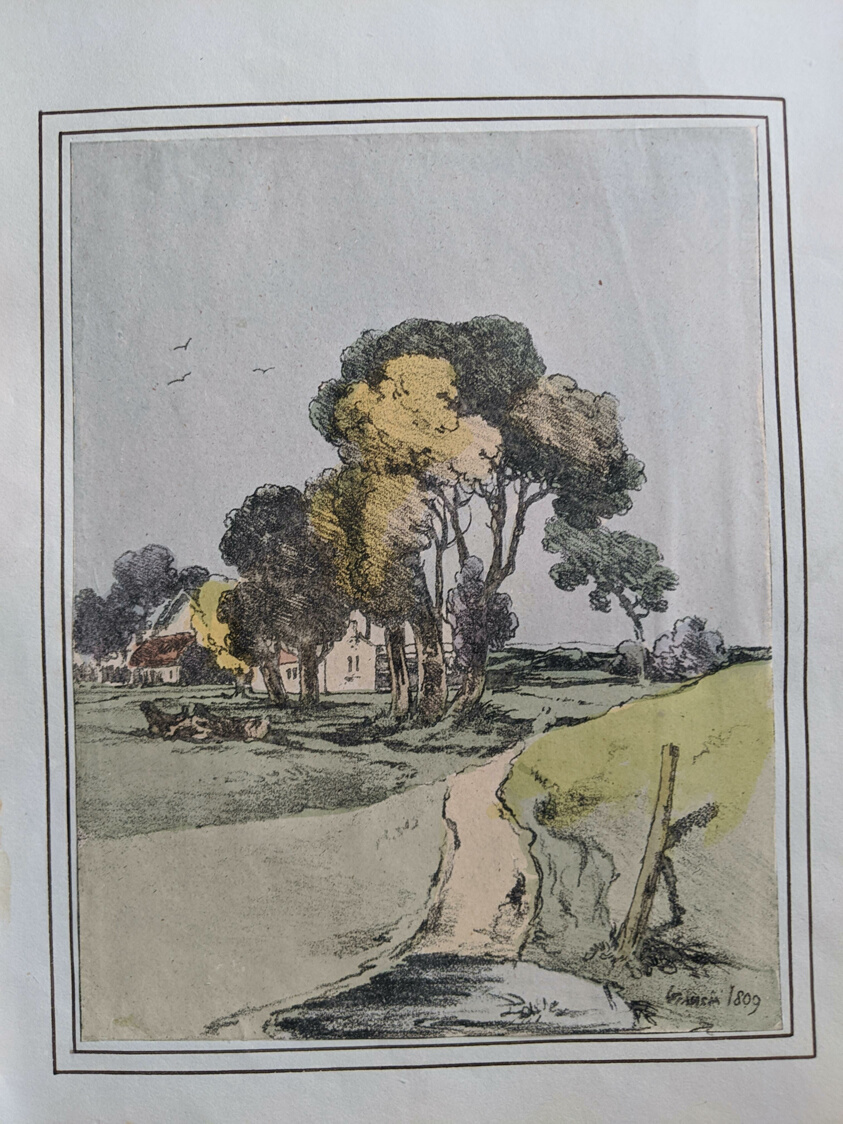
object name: Print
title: Studies of Landscapes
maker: François-Thomas-Louis Francia (French, 1772–1839); after various English artists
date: 1810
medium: 46 soft ground etchings in black, some heightened with wash, on ivory, blue, and buff wove papers, mounted onto 39 sheets of cream wove paper, ruled with pen and brown ink (with 5 unrelated prints)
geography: France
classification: prints and drawing; paper; print; etching